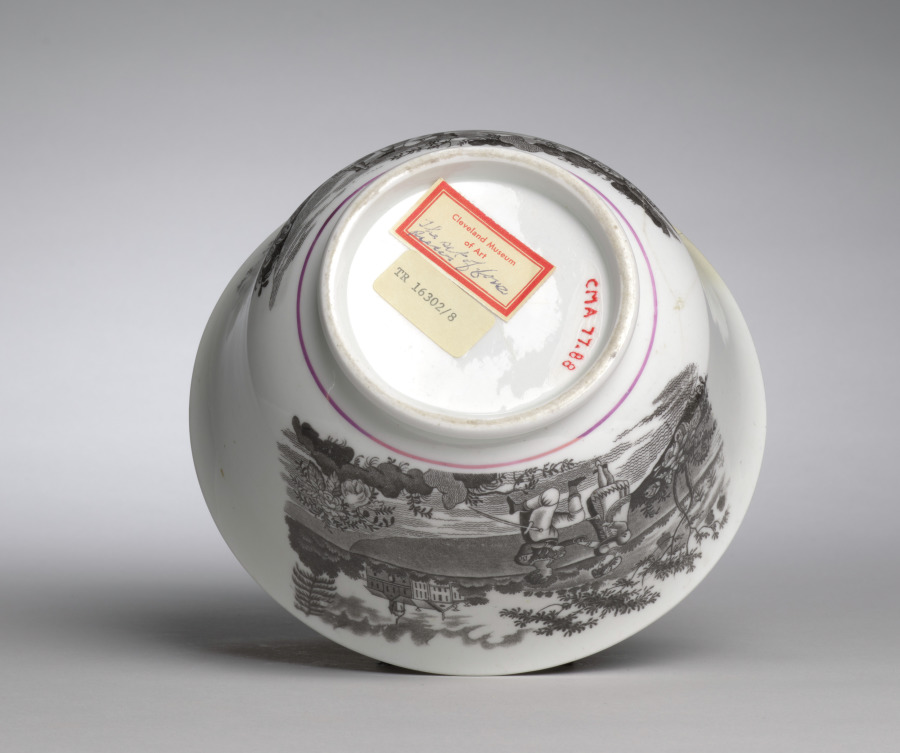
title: Waste Bowl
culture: England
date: c. 1800–1825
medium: earthenware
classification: Ceramic